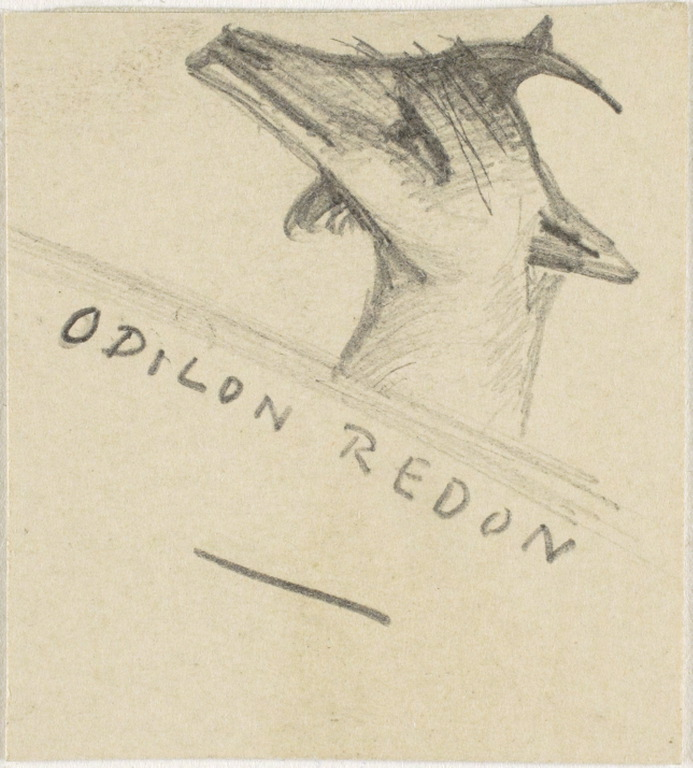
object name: Drawing and Watercolor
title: Goat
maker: Odilon Redon (French, 1840-1916)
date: 1890/03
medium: Graphite on cream wove card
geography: France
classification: graphite; drawings (visual works); prints and drawing; paper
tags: goats, animals, circles, prints and drawings